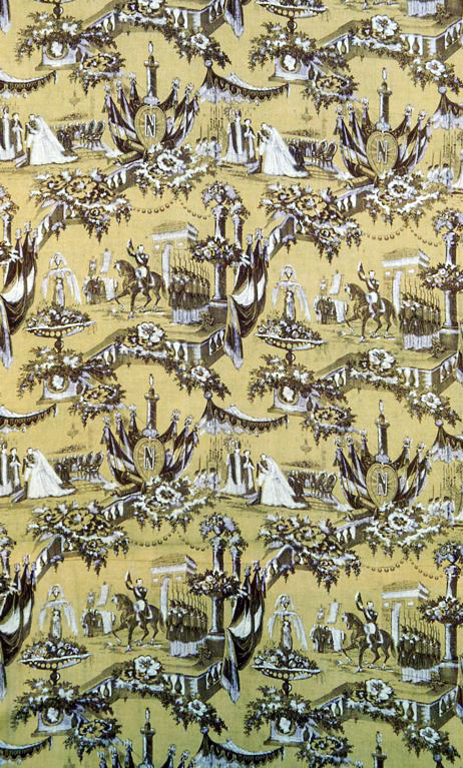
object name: Textile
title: The Marrige of Eugenie and Napolean (Furnishing Fabric)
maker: France, Alsace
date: 1854/55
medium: Cotton, plain weave; engraved roller printed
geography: France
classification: textile; weaving - printed; furnishing textile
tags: propaganda